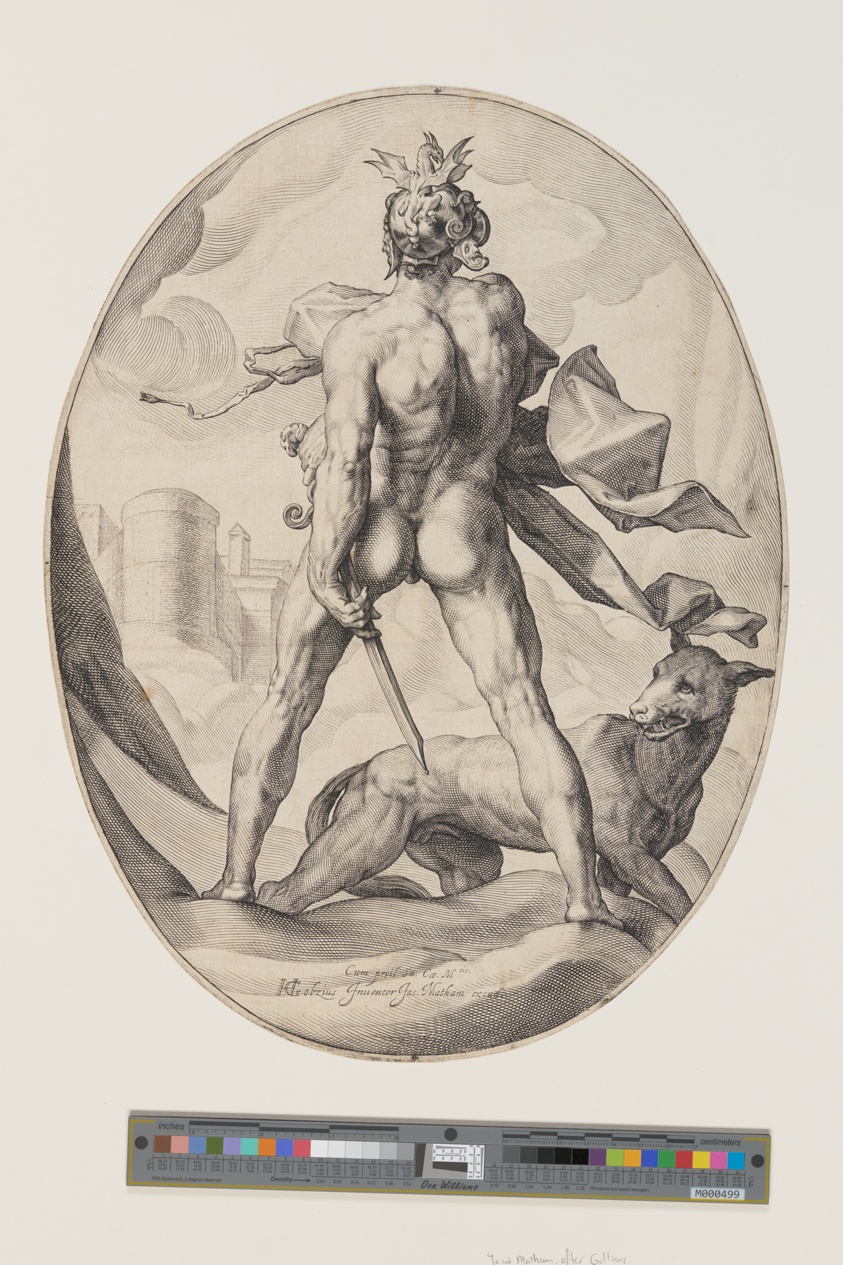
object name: Print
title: Mars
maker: Jacob Matham (Dutch, 1571–1631); after Hendrick Goltzius (Dutch, 1558–1617)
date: c. 1590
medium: Engraving on ivory laid paper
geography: Netherlands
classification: print; paper; prints and drawing; engraving